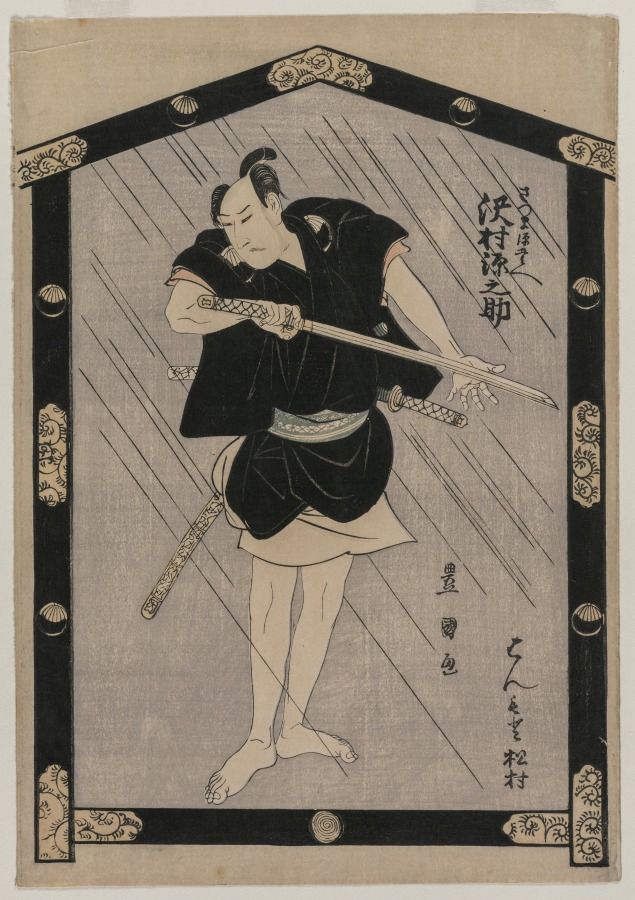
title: Sawamura Gennosuke as Satsuma Gengobei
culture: Japan, Edo period (1615–1868)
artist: Utagawa Toyokuni (Japanese, 1769–1825)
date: c. 1805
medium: color woodblock print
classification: Print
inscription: Signature: Toyokuni ga Publisher: Matsumura Yahei (hanmoto Matsumura)